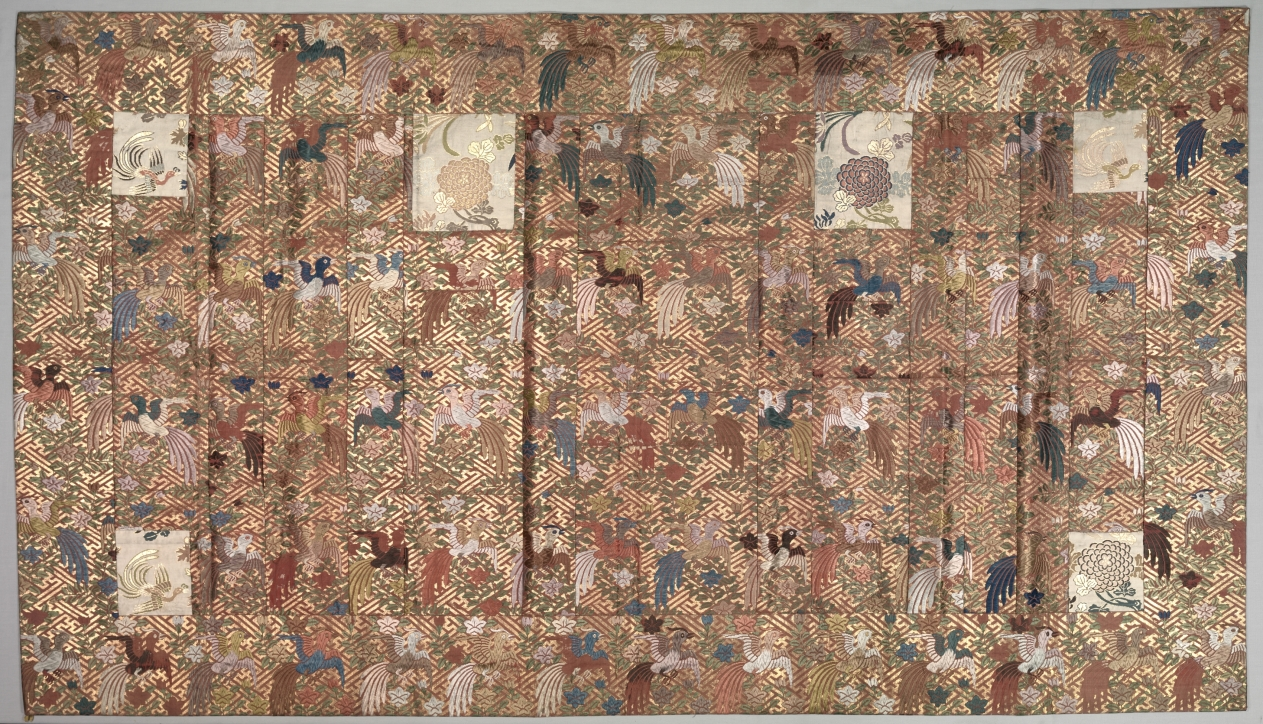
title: Buddhist Priest Robe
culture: Japan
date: 1700s–1800s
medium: silk with supplementary weft, brocaded; metal thread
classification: Garment